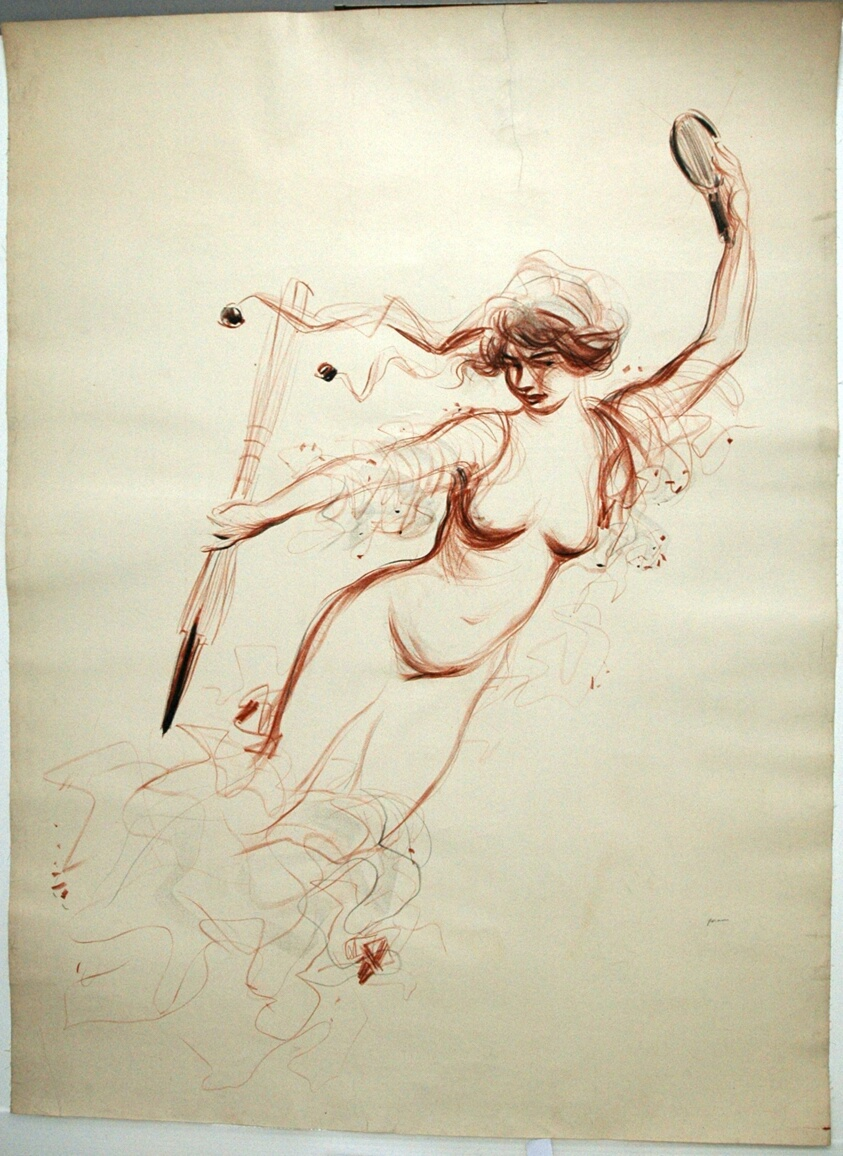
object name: Print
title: 2nd Exhibition of the Humorists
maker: Jean Louis Forain (French, 1852-1931)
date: 1911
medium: Color lithograph on cream wove paper laid down on linen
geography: France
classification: lithograph; print; prints and drawing